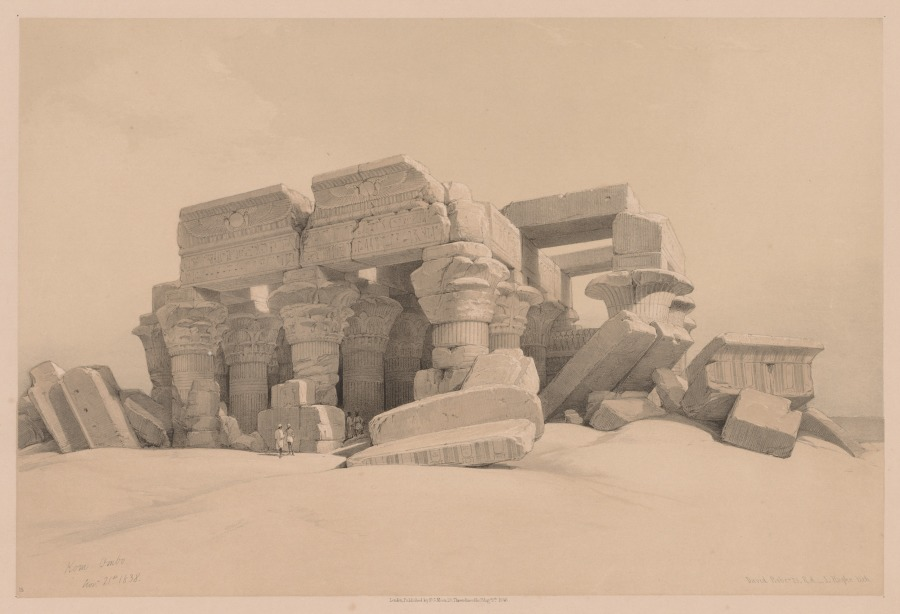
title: Egypt and Nubia: Volume I - No. 1, No. 2, Remains of the Portico of the Temple of Kom Ombo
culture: England, 19th century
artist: Louis Haghe (British, 1806–1885)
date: 1838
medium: color lithograph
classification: Print